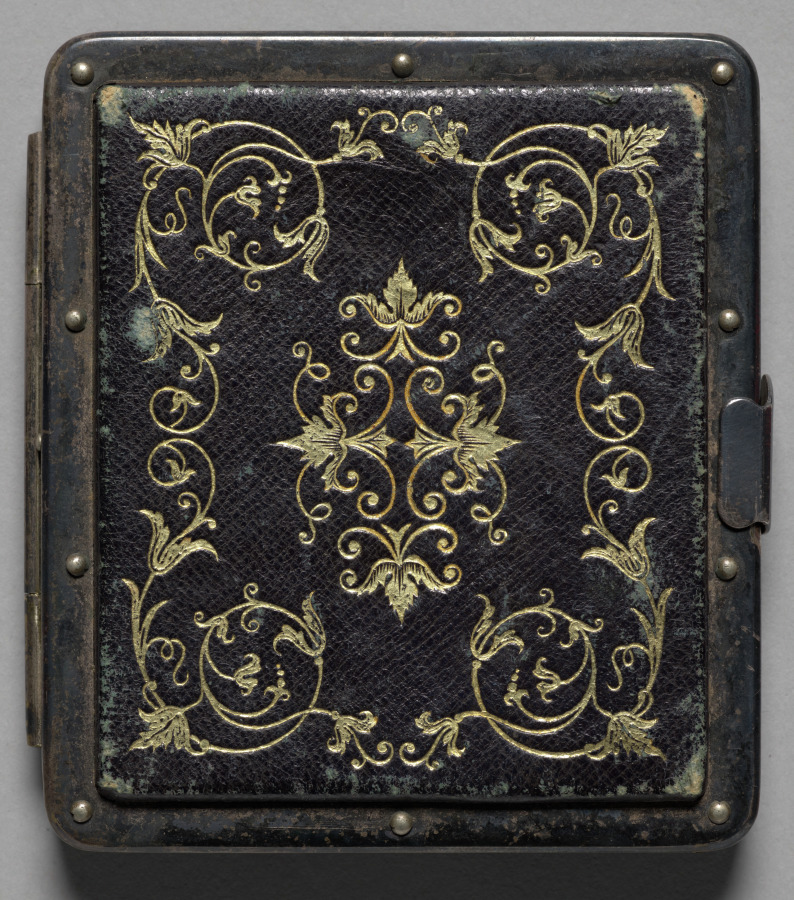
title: Construction of the John Stewart Store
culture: America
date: c. 1856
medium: daguerreotype, sixth plate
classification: Photograph